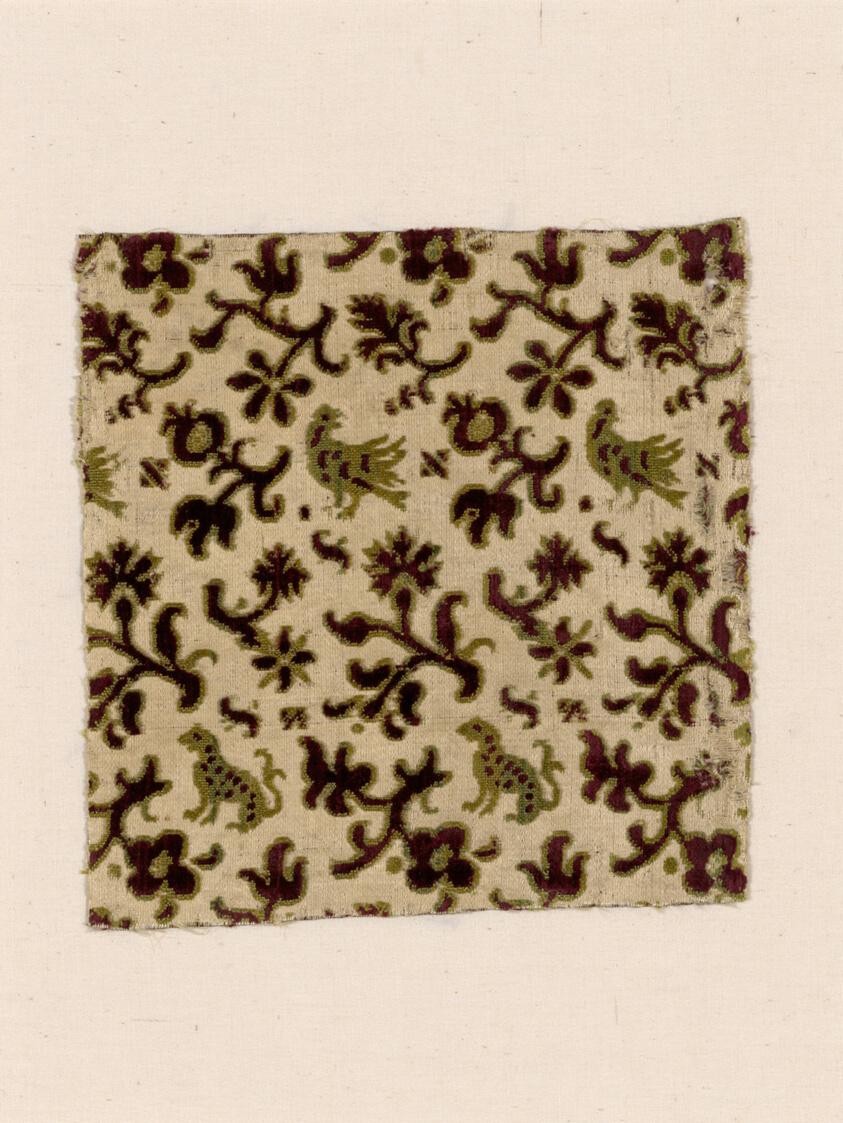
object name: Textile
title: Fragment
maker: Italy, Florence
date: 1601/25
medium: Silk, cut, uncut, and voided velvet against satin weave foundation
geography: Florence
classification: textile; weaving - velvet; weaving